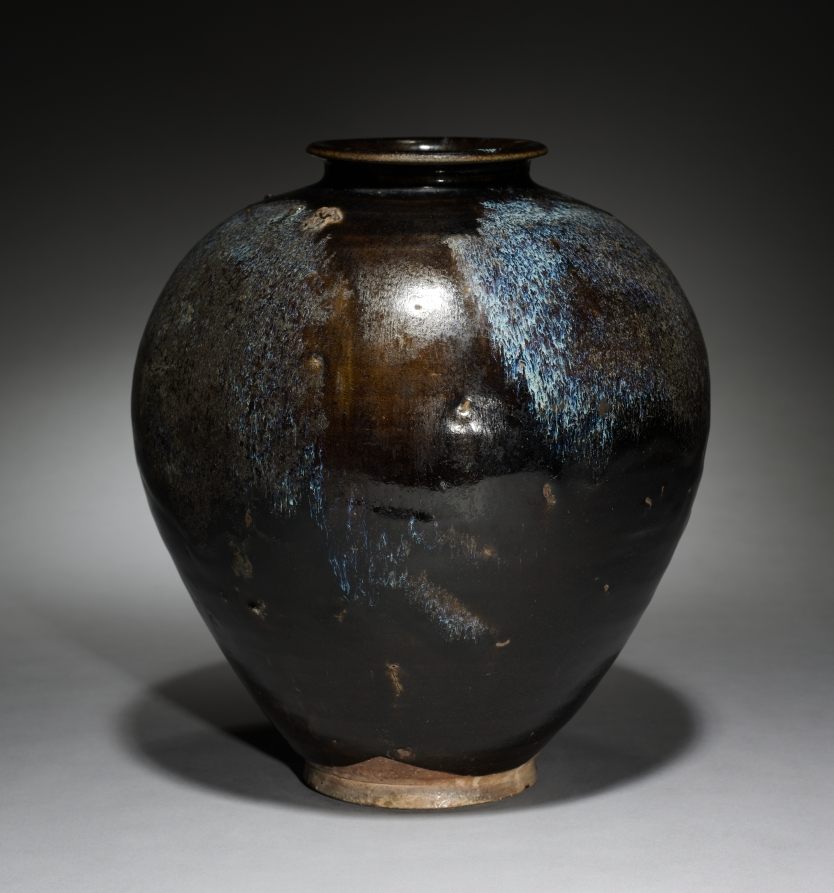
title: Jar: Black Ware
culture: China, Henan province, Huangdao kilns, Tang dynasty (618-907)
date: 700s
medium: glazed stoneware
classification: Ceramic